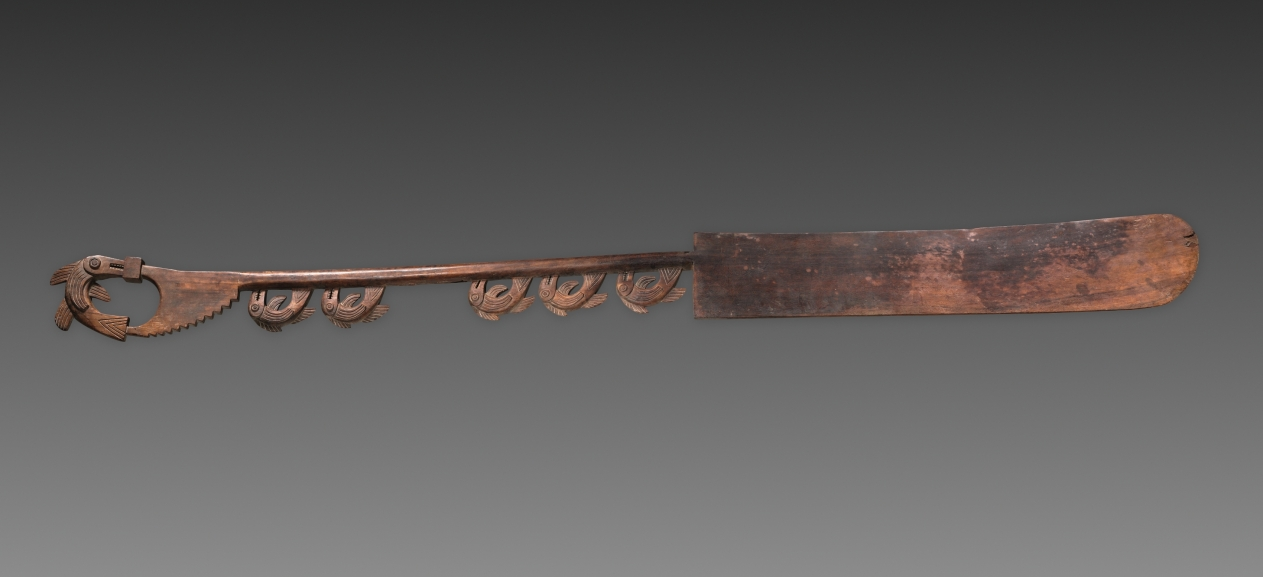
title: Carved Board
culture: Peru, South Coast, Ica Valley, 15th-16th century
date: 1400s-1500s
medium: wood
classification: Sculpture